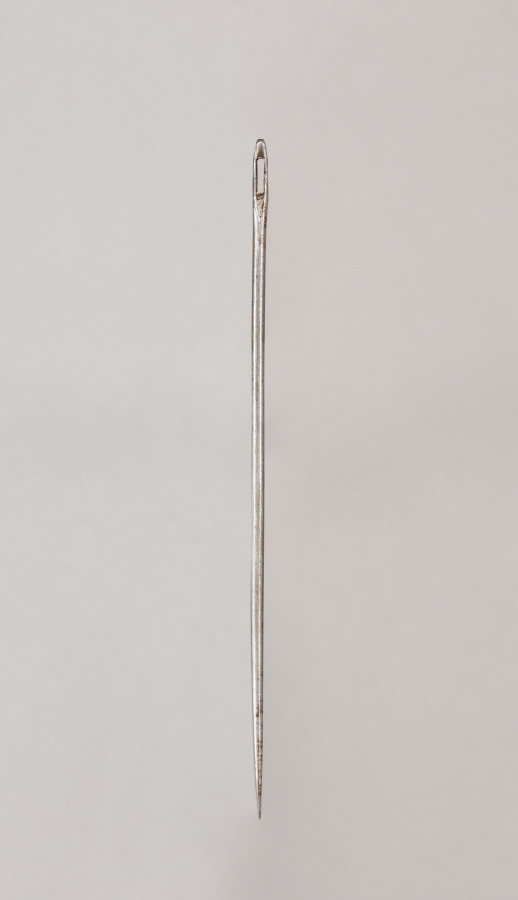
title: Scabbard Needle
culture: Africa, East Africa, Sudan, unknown maker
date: 1880–1910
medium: metal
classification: Arms and Armor